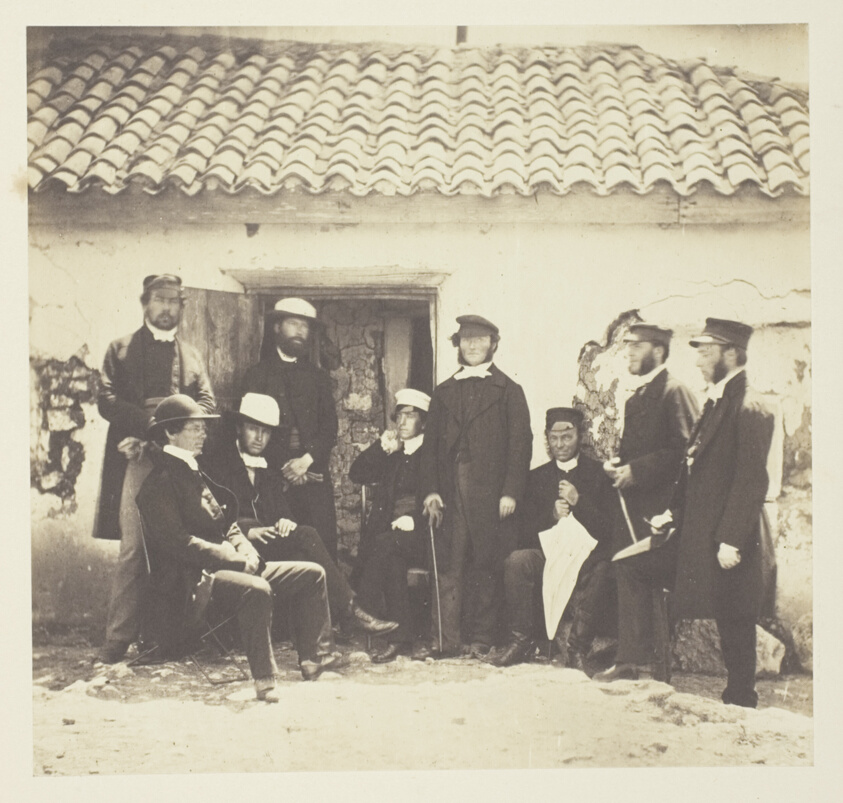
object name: Photograph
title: Untitled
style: 19th century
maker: Roger Fenton (English, 1819–1869)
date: 1855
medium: Salted paper print, plate 30 from the album "Photographs Taken in the Crimea" (1856)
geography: England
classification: salted paper print; photographic process; photography; photograph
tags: Collected by Hugh Edwards, Crimea 1856